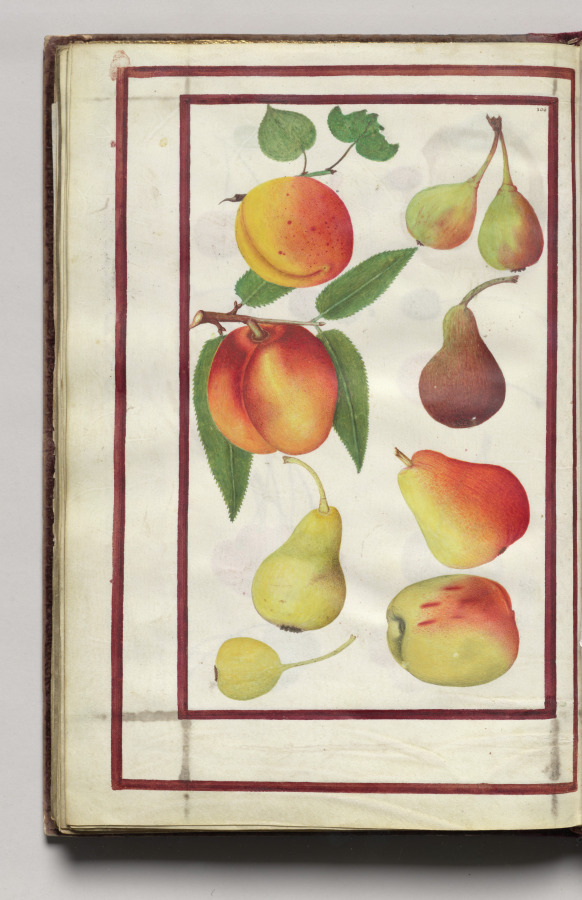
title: Peaches, Pears, and Figs, folio 47 (verso), from Florilegium (A Book of Flower Studies)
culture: France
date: 1608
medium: watercolor, ink, silver, and gold over occasional traces of pencil, on vellum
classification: Bound Volume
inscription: Dated: Poitiers 1608 (on frontispiece) Signed: On frontispiece in black ink, lower right: Van Kuyk Notation on drawing: Frontispiece: in pencil, lower margin: * élève de Van Kessel, peintre flammand (* in pencil also appears in front of Van Kuyk's name).